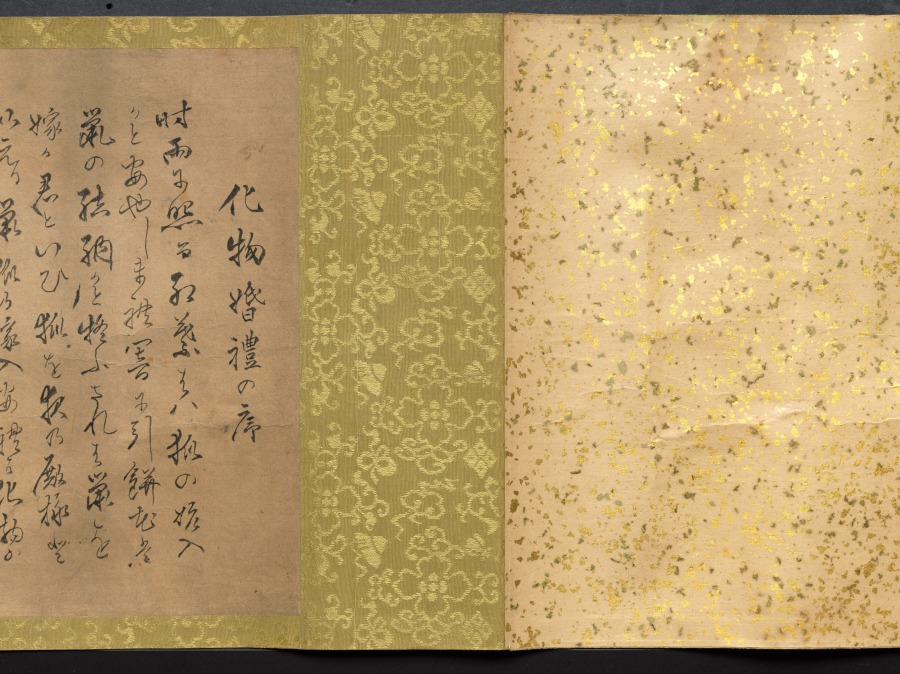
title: An Illustrated Marriage of Apparitions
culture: Japan, Edo period (1615–1868)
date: mid-1800s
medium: handscroll; ink and color on paper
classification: Painting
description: The matchmaking, engagement, wedding, and birth of the first child of two apparitions, or bakemono, literally "things that change," are illustrated in this whimsical, humorous handscroll. Japanese folklore abounds with such strange creatures, most famously represented in handscrolls featuring a procession of 100 supernatural monsters. Aside from a textual preface and cartouches indicating the content of the scenes, the tale is told visually. The artist and whereabouts of the original handscroll are unknown, but a number of other 19th-century copies by amateur painters exist in Japanese collections, attesting to its broad appeal.